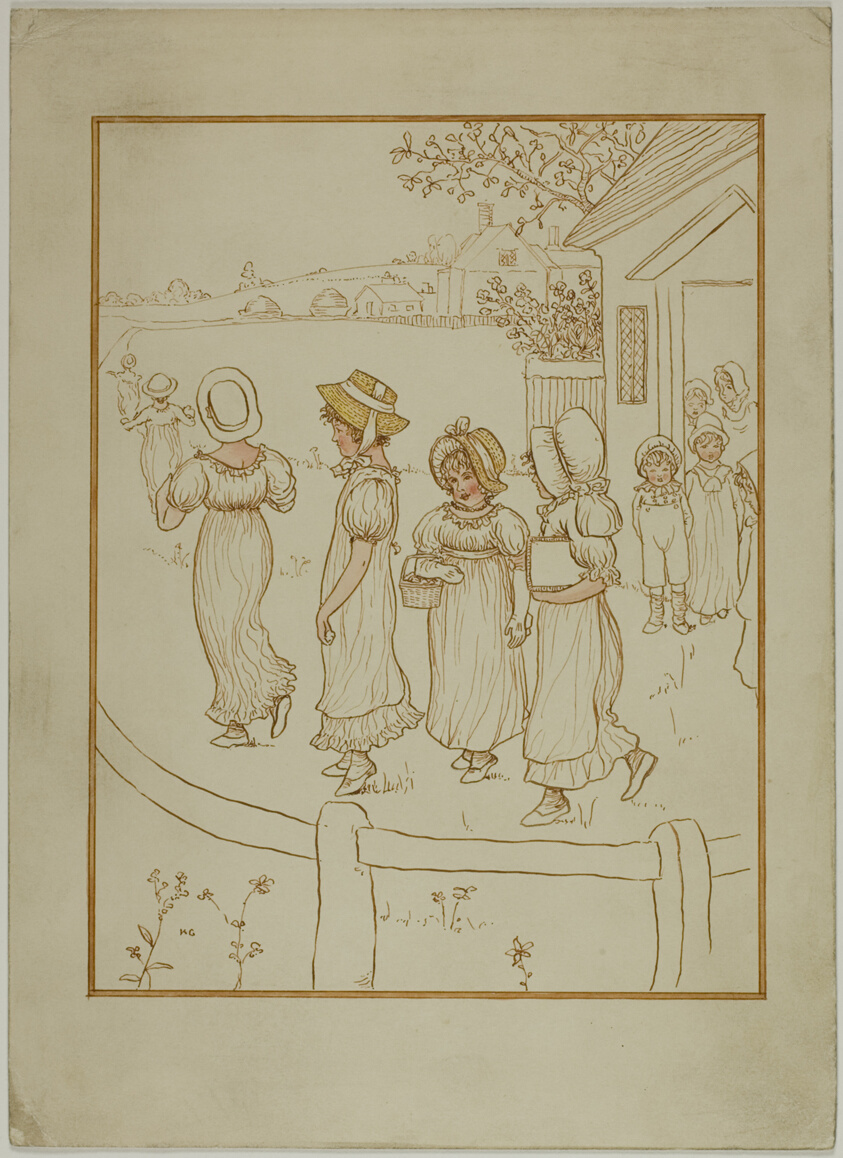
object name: Drawing and Watercolor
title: Girls Going Down a Lane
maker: Attributed to Kate Greenaway (English, 1846-1901); or an imitator of Kate Greenaway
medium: Pen and red-brown ink, with brush and yellow and pink wash, on cream wove card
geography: England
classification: pen and ink drawings; drawings (visual works); prints and drawing